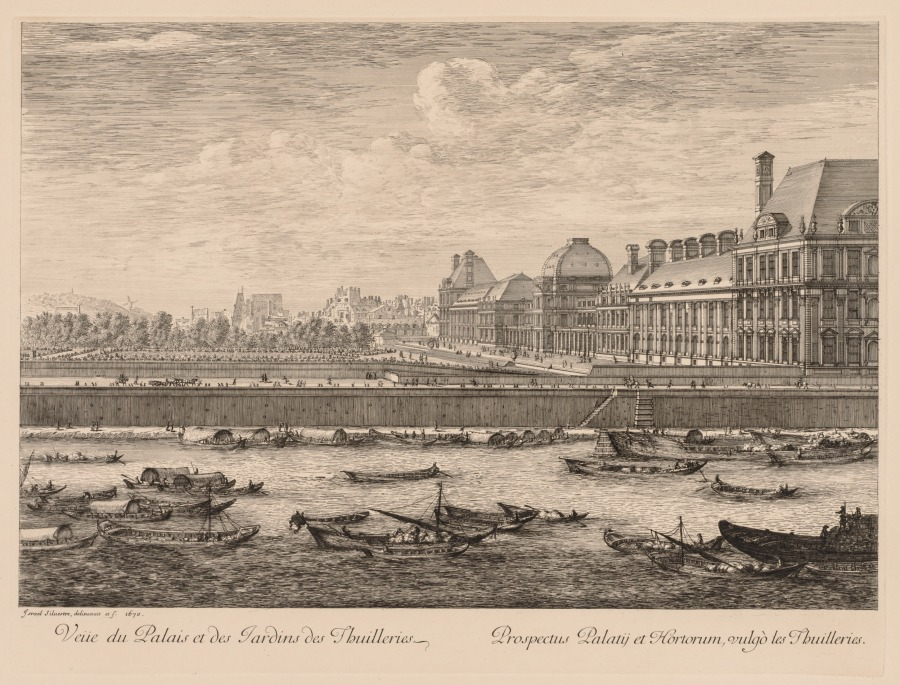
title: Vue du palais et des jardins des Tuileries, du côté du quai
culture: France, 17th century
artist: Israël Silvestre (French, 1621–1691)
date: 1670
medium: engraving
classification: Print